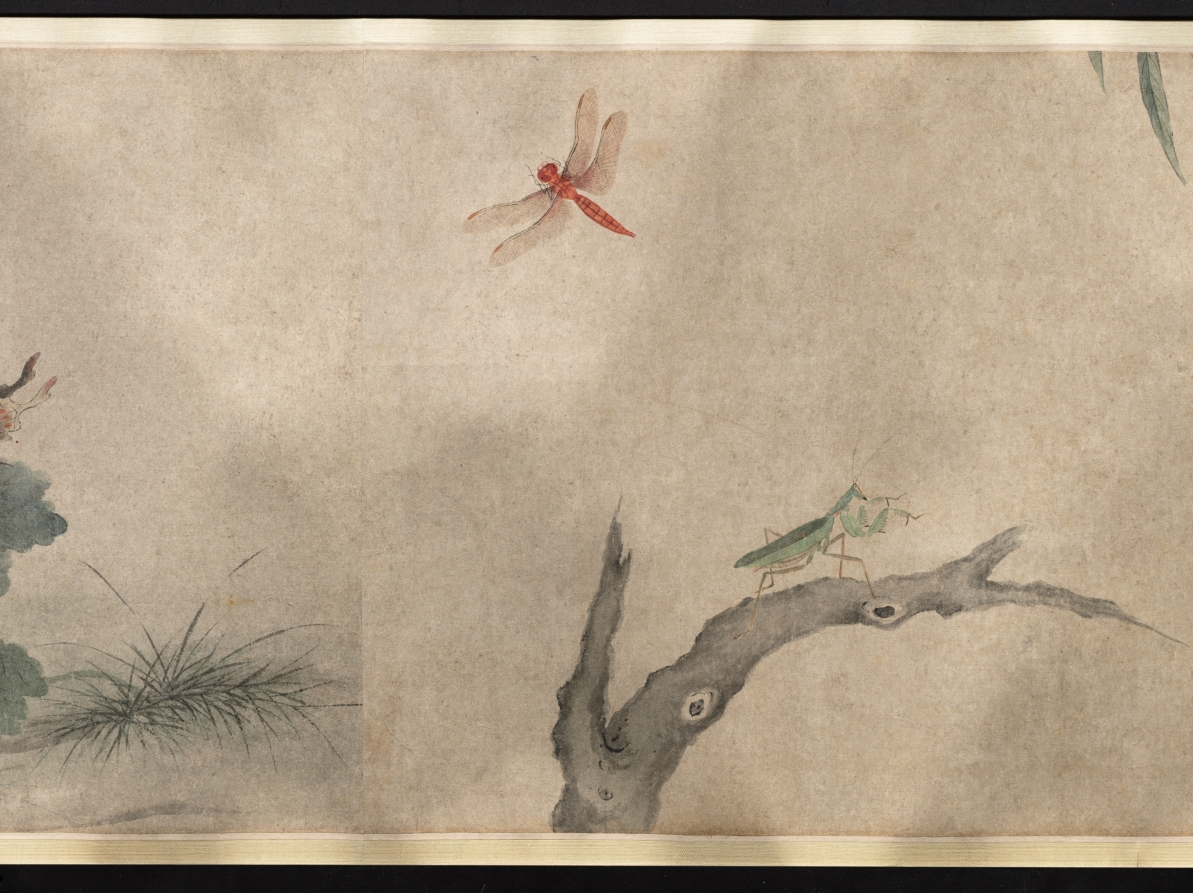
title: Insects and Flowers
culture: China, Qing dynasty (1644-1911) or Republican period (1912-49)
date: c. 1900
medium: Handscroll, ink and color on paper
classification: Painting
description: More than 26 feet long, this scroll presents insects, reptiles, and plants in delicate brushwork and pale colors, referring in style to earlier Southern Song dynasty (1127–1279) bird-and-flower paintings. Upon closer inspection, ants dismember a butterfly and reptiles wait to ambush their prey. An inscription at the end of the painting gives us an idea of its meaning: Attributed to the Qing dynasty scholar Zhang Xigeng (張錫庚, 1801–1861), the inscriber relates the work to an earlier painting by Qian Xuan (錢選, c. 1235–before 1307) and further suggests that the painting may allude to the relentlessness of natural selection. By drawing a parallel to tumultuous episodes in Chinese history, the writer might even hint at the domestic rebellions and the aggression of Western powers against China in his lifetime, particularly the Opium Wars (1839–60).